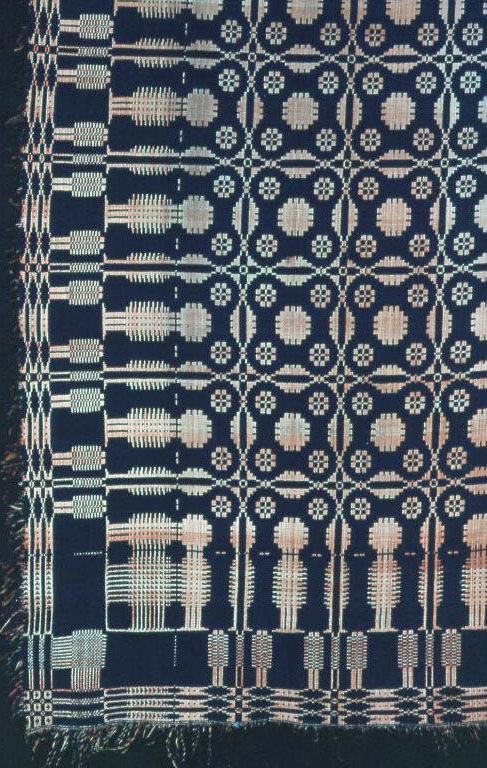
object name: Textile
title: Coverlet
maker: United States, Ohio, Cleveland area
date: c. 1825/35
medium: Wool, plain weave double cloth with main warp and extended ground weft fringe; two loom widths joined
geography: Ohio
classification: textile; coverlet; weaving - coverlet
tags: coverlet